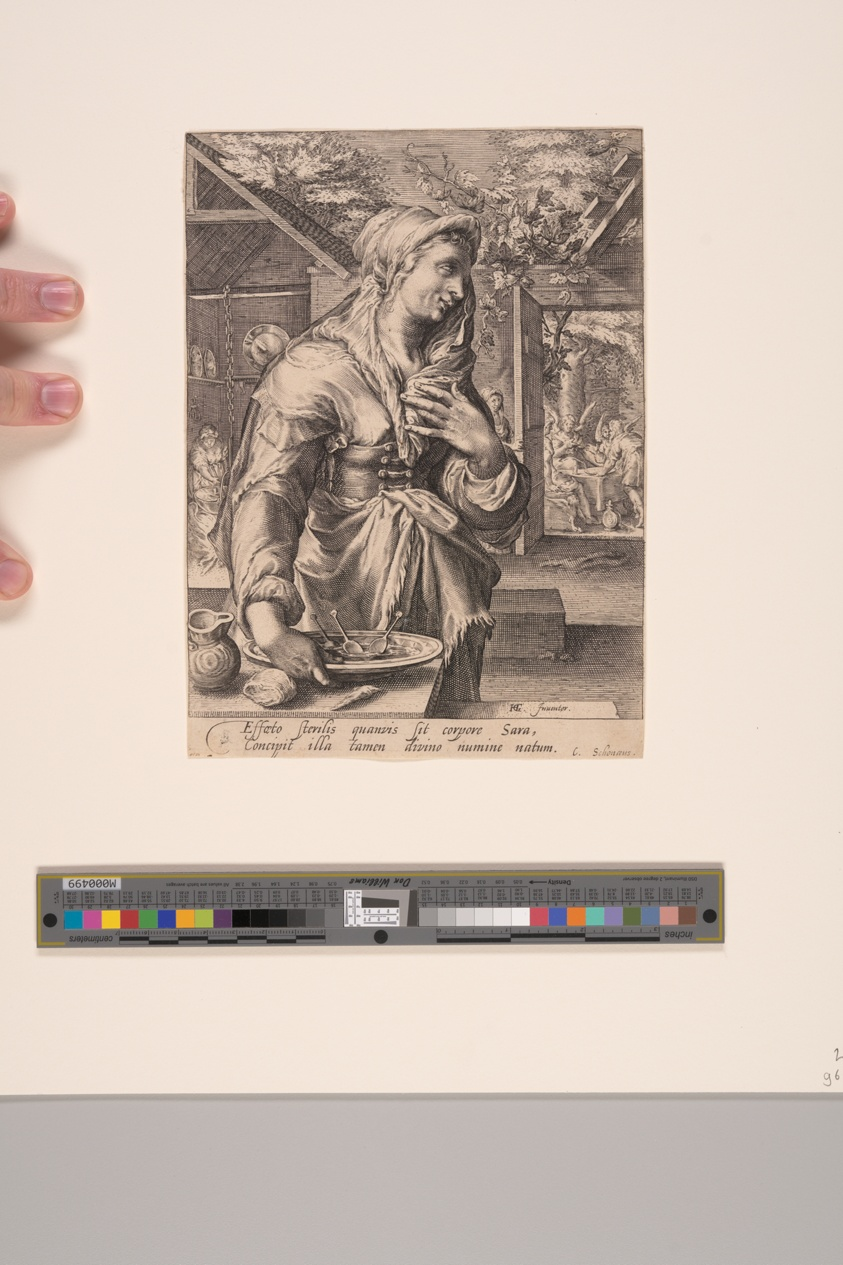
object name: Print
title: Sarah, from The Wives of the Patriarchs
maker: Jacob Matham (Dutch, 1571–1631); after Hendrick Goltzius (Dutch, 1558–1617)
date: 1597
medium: Engraving on laid paper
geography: Netherlands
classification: print; engraving; paper; prints and drawing